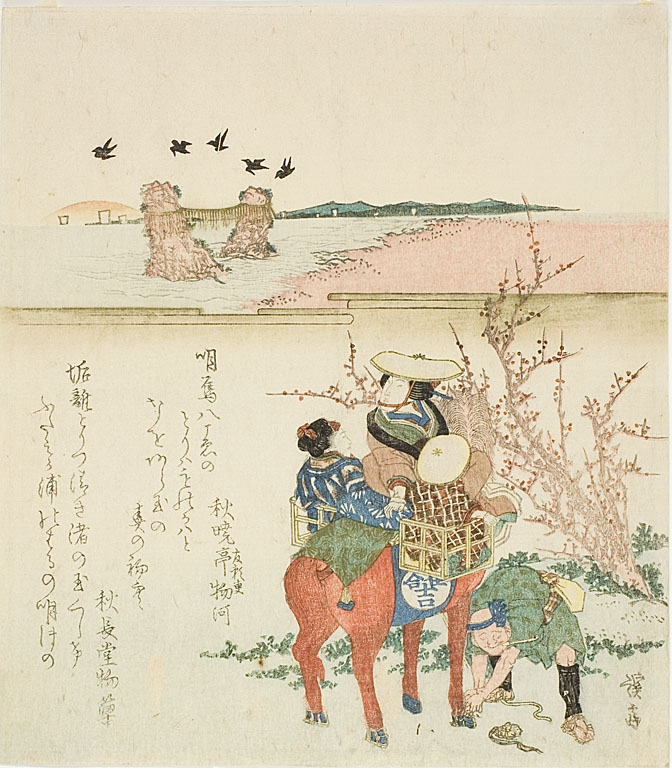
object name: Print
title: A Couple Visiting the Wedded Rocks (Meoto Iwa) by Futamigaura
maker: Keisai Eisen (Japanese, 1790–1848)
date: 19th century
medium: Color woodblock print; surimono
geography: Japan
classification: woodblock print; print; asian art